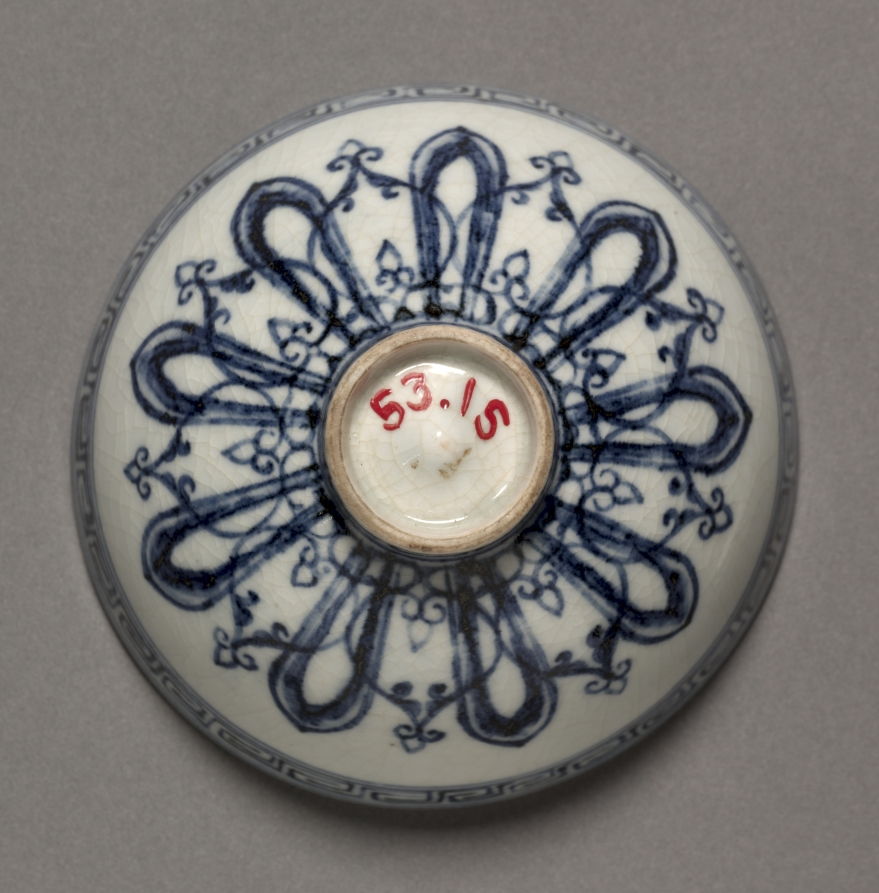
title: Lotus-Seed Bowl with Petals and Arabesques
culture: China, Jiangxi province, Jingdezhen, Ming dynasty (1368-1644), Yongle period (1403-1424)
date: 1403–24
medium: porcelain with underglaze blue decoration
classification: Ceramic